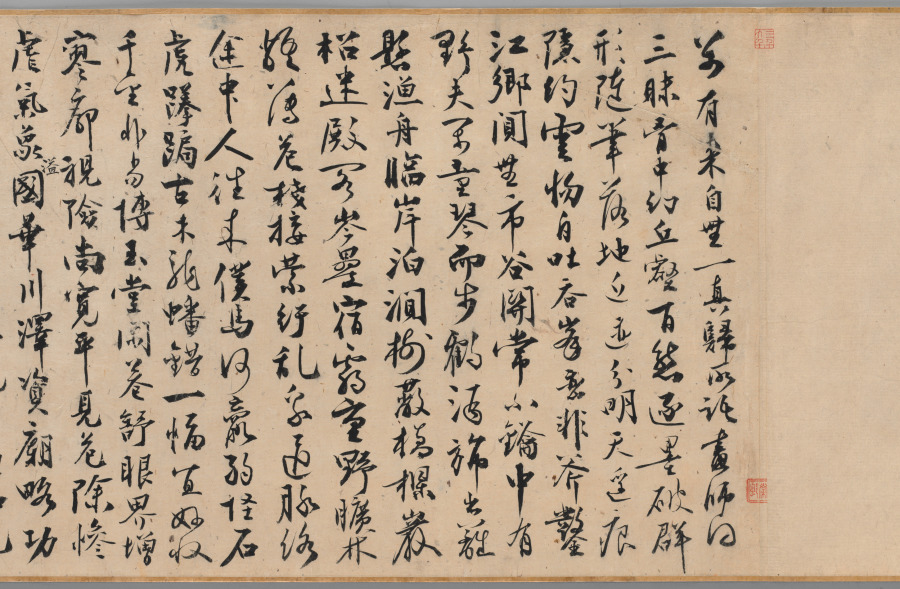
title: Streams and Mountains without End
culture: China, late Northern Song dynasty (960-1127) - Jin dynasty (1115-1234)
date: 1100–1150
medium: handscroll; ink and slight color on silk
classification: Painting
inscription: 9 colophons and 48 seals: 1 colophon, dated 1205, of Wang Wenwei 王文蔚 (dates unknown); 1 colophon, dated 1205, of Li Hui 李惠 (dates unknown); 1 colophon of Weiluo Tian Xie 蔚羅田獬 (dates unknown); 1 colophon, dated 1214, of He Yan 何言 (dates unknown); 1 colophon, dated 1326, of Cao Yuanyong 曹元用 (d. 1329) 1 colophon, dated 1332, of Kangli Zishan 康里子山 (Naonao; 1295-1345); 1 colophon, dated 1336, of Liu Zai 劉載. (dates unknown); 1 colophon, dated 1380, and 4 seals of Yang Mao 楊懋 (1300-after 1380); 4 seals of the Hou family (ca. 1340); 1 colophon of Wang Duo 王鐸 (1592-1652); 4 seals of Zhang Bingqian 張秉乾 (juren of 1729); 8 seals of Liang Qingbiao 梁清標 (1620-1691); 2 seals of the Qianlong emperor (r. 1736-95); 4 seals of the Jiaqing emperor (r. 1796-1820); 3 seals of the Xuantong emperor (r. 1909-11); 2 seals of Ye Gongchuo 葉恭綽 (1881-1968); 17 seals of Zhang Yuan 張爰 (Zhang Daqian 張大千, 1899-1983).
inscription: Colophon 1. Wang Wenwei 王文蔚. Dated third month and third day, 1205, under the reign of Zhangzong of the Jin dynasty. 造物元無心，山川秀氣聚。畫手亦無盡，各出新意度。 誰將妙林泉，淡墨寫縑素。重巒疊嶂間，三兩人家住。 茅舍隔素籬，小橋通細路。溪上數葉舟，雅有物外趣。 嵓崦藏招提，依稀認窗戶。山色四時宜，雲煙自朝暮。 不知塵世中，此景在何處。收拾買山錢，投老好歸去。 泰和乙丑三月三日平原王文蔚謹再拜，書于河東縣署之野趣堂。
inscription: Colophon 2. Li Hui 李惠. The colophon was written three days before the Qingming Festival in 1205. 畫師慣在山中居，含毫吮墨聊自娛。 閑將一段冰霜絹，寫出千里江山圖。 前山後山互出沒，山腰林樾相縈紆。 危橋澗溜瀉鳴玉，山根一匯為平湖。 波平短艇快漁釣，雲深細徑來樵蘇。 僊宮梵宇占幽勝，雕欄複閣森蓬壺。 往來行客煙靄外，飄飄野店青帘孤。 人家雞犬聲相接，熙熙化日安唐宇。 嗟余嗜好何其迂，膏肓泉石真吾徒。 一行作吏墮世網，薄書汨沒勞奔趨。 千巖萬壑但夢想，故園三徑應將蕪。 披圖暫洗黃塵眼，拊膺三嘆空踟躕。 泰和乙丑清明前三日絳臺李惠書于舜城府署之九思堂。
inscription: Colophon 3. Weiluo Tian Xie 蔚羅田獬. 畫工紛紛不可紀，擺脫俗流幾人耳。 夫誰援筆掃鵝溪，一段風煙且千里。 白波青嶂渺無窮，水接山兮山插水。 小橋野店相勾連，古寺樓臺突兀起。 飄然氣象與神俱，但患未明孰姓氏。 郭熙雖老典型存，為問主公無乃是。 此畫世希當寶藏，無與碌碌同一視。 更看卷首數公詩，奇絕清新相表裏。 蔚羅田獬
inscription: Colophon 4. He Yan 何言. Written in 1214. 萬有來自無，一真歸所託。畫師得三昧，胸中幻丘壑。 百態逐墨破，群形隨筆落。地近迹分明，天遙痕隱約。 雲物自吐吞，峯巒非斧鑿。江鄉閴無市，谷關常不鑰。 中有野夫閑，童琴而歩鶴。酒斾出籬懸，漁舟臨岸泊。 澗樹蔽橋樑，巖松迷殿閣。岑疊宿霧重，野曠林煙薄。 危棧接縈紆，亂泉通脈絡。途中人往來，僕馬何羸弱。 怪石虎踡跼，古木龍蟠錯。一幅宜好收，千金非易博。 玉堂閑卷舒，眼界增寥廓。視險尚寛平，見危除慘虐。 氣象溢國華，川澤資廟略。功名業已書，歸去鞭先著。 但知色即空，何是今非昨。飽乎仁智心，箇中無限樂。 貞祐甲戌秋暮，東營何言題。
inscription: Colophon 5. Cao Yuanyong 曹元用 (d. 1329). Dated 1326. 岸擁危橋斷，溪浮小艇斜。 萬山最深處，依約兩三家。 泰定丙寅秋，曹元用題。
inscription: Colophon 6. Kangli Zishan 康里子山 (i.e., Kangli Naonao). The colophon bears a date of 1332. 右溪山圖，意韻蕭灑。一見使人有烟霞之想，真可珍藏。又有□金諸名勝題詩其左。兵火之餘， 殊不易得也。 至順三年暮春之月，康里子山跋。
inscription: Colophon 7. Liu Zai 劉載. 雲拂埜田閑種玉，雨餘巖溜碎傾金。 幾時也結團茆去，麟閤恬然不挂心。 至元二年正月，長安劉載載之謹錄上。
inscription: Colophon 8. Yang Mao 楊懋 (1300–after 1380). 觀此圖，經營位置，筆法高古，山明石潤。其橋梁、路道、樹林、人物、遠近；一一誠得真山水之深趣。非當時名筆有大才者不能至此。不必問其誰何，可為神品。况宋金元三朝名公所跋，尚不能記，想其來尤遠矣。然而物經累變而尚存，是物之有壽者也。余不復再論。文顯其保之。洪武庚申春，八十翁楊懋觀。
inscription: Colophon 9. Wang Duo 王鐸 (1592–1652). 文蓀親翁博雅，文詩鴻暢。舍弟持此喜觀，遂抽管題數語： 山勢委折，筆墨無痕。宋人中如此不多見也。譬之兵家，當是韓白。王鐸。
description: Streams and Mountains without End was a landmark acquisition of 1953, made just a year after Sherman Lee had returned to Cleveland as curator of Oriental art. He acquired it with the intention to provide "a more than adequate foundation for a fine collection of Chinese landscape painting." This impressive work demonstrates the culmination of stylistic developments in Chinese monumental landscape painting following the Northern Song tradition. It represents a journey through a landscape, making it a fitting metaphor for Lee’s journey of discovery and achievement over a lifetime.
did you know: The portrayal of the distant lands is rich with details like pavilions, villages, and human activities.